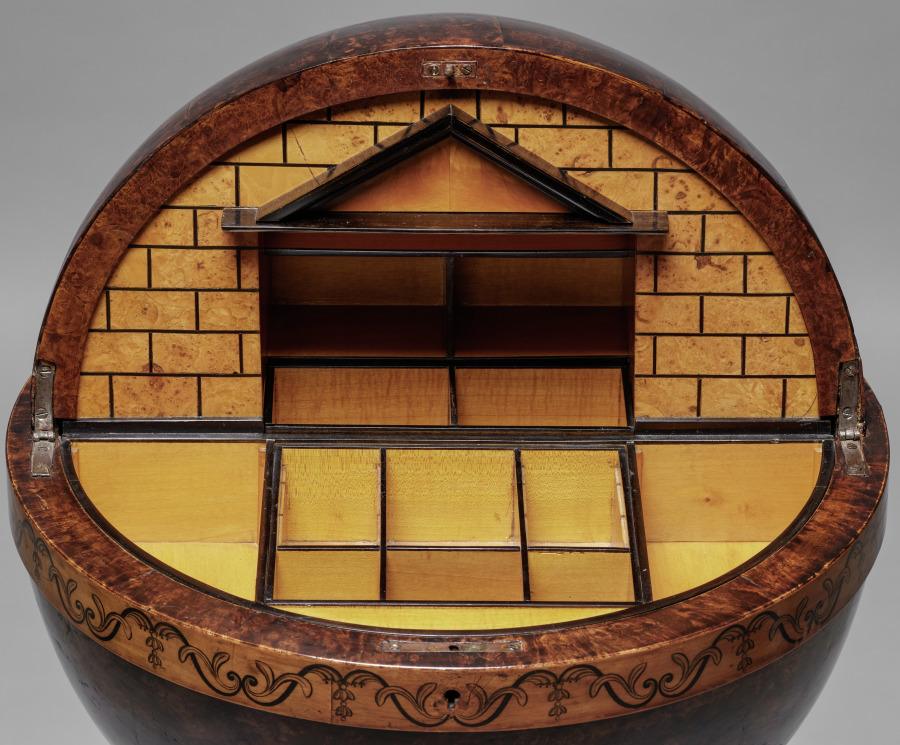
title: Globe Work Table (Globustisch)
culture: Austria, Vienna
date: c. 1810–15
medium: Burl walnut veneer, mahogany, ebony, satinwood, gilt wood, painted wood; mirrored glass; metal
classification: Furniture and woodwork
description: Work tables resembling globes were the usual form for a lady's sewing or writing table around 1800 in Austria. Combining moving parts, secret compartments, and highly finished decoration, these tables were also a way for the cabinetmaker to show off his skill. The tripod supports and temple-like architectural quality of both the exterior and interior decoration reflect the fashionable taste for neoclassical style, or Biedermeier as it was called in Austria, where Vienna was the center of such elaborate furniture production.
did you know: The top half of the globe rotates upward to reveal hidden compartments for sewing tools, threads, and unfinished fabric pieces.